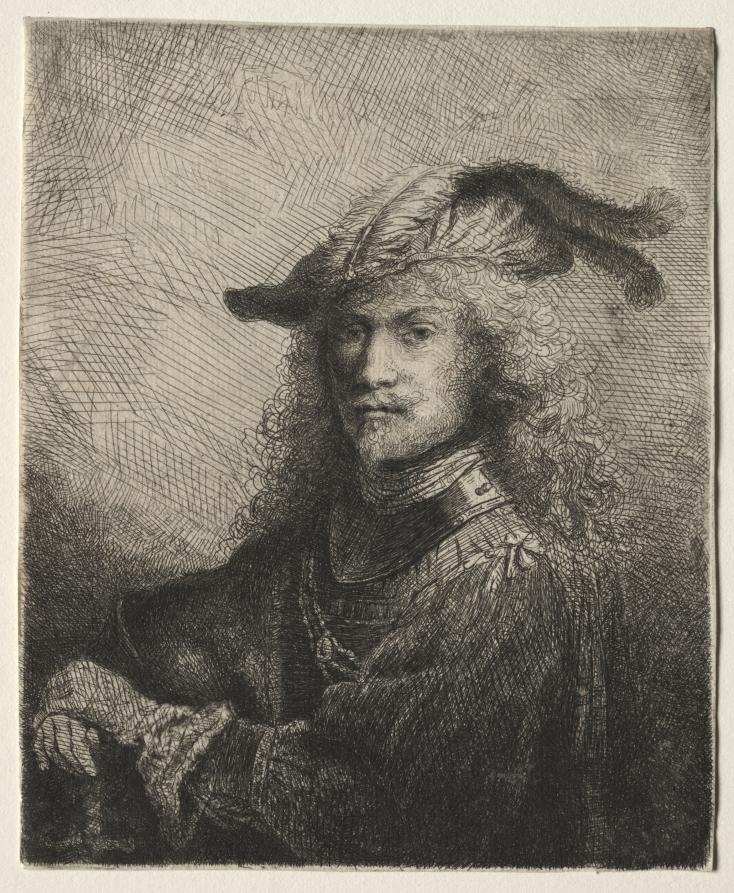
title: Portrait of an Officer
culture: Netherlands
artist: Ferdinand Bol (Dutch, 1616–1680)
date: 1645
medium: etching and drypoint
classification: Print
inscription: upper left, in plate: f bol 1645 (6 is reversed); VERSO, upper center, in graphite: [2?...] 10 (erased); lower left, in graphite: B.11; across bottom, in graphite ; C/4260 (crossed out) C27124 (crossed out) [MK?] 23085; lower right, in graphite: C 8103